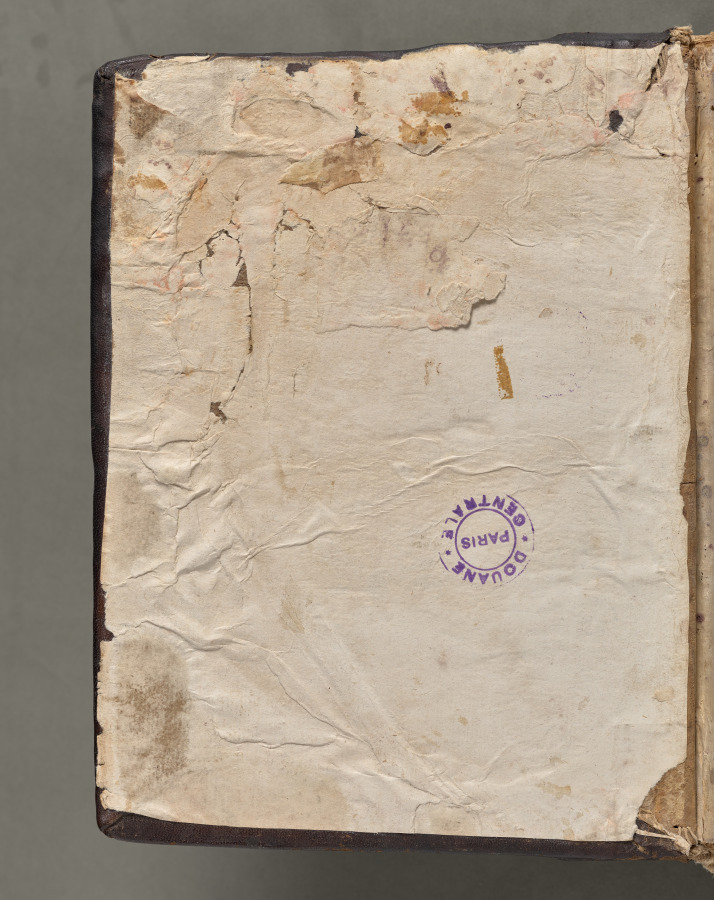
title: Text, folio 1 (verso), from a Gospel Book with Commentaries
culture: Byzantium, Constantinople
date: c. 1000–1100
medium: ink, tempera, and gold on vellum; leather binding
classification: Bound Volume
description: Each of the four gospels in this book opens on a page with brilliantly illuminated borders depicting the author of the text as well as birds-principally peacocks, symbols of the immortality of the soul-and fountains, representing the fountain of life and the salvation of the soul. This volume consists of 428 leaves with texts in Greek. Its level of sophistication suggests that it was probably written and decorated in a monastery in Constantinople.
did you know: Gospel Books were carried in procession through Byzantine churches.